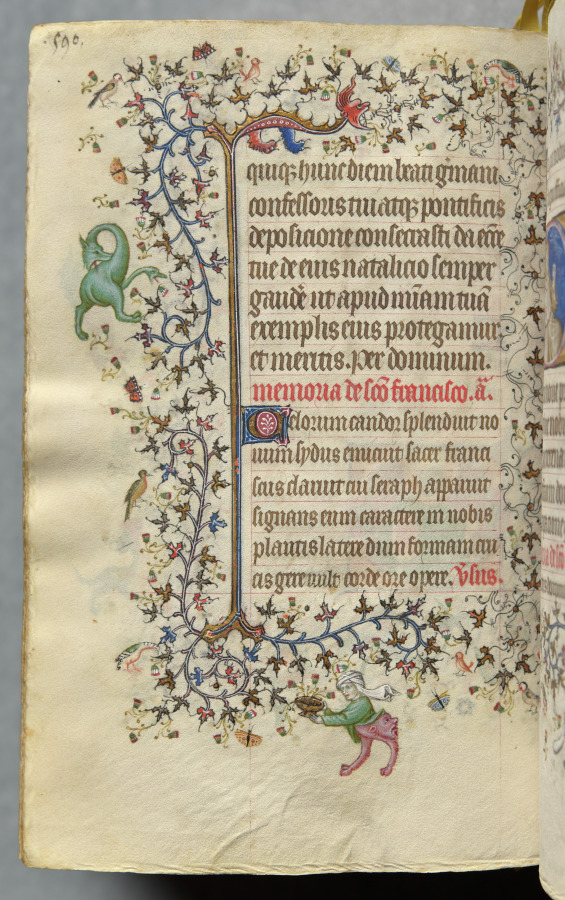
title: Hours of Charles the Noble, King of Navarre (1361-1425): fol. 289v, Text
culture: France, Paris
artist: Master of the Brussels Initials and Associates (French)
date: c. 1405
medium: ink, tempera, and gold on vellum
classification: Bound Volume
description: This precious volume was obviously highly prized by its owner, the French-born King of Navarre, who had his coat of arms painted on no less than twenty folios. Rather than directly commissioning this manuscript from a specific workshop, it seems that Charles the Noble acquired his book of hours -- perhaps ready-made for the luxury market -- while on a trip to Paris in 1404-05. A collaborative effort, six painting styles are evidenced within the pages of this codex, those of two Italians, two Frenchmen, and two Netherlanders. The painter who was responsible for the planning and decoration of the book, and who produced seventeen of the large miniatures, was a Bolognese artist known as the Master of the Brussels Initials. His principal assistant, responsible for most of the borders, was a Florentine who signed his name "Zecho" da Firenze on folio 208 verso.